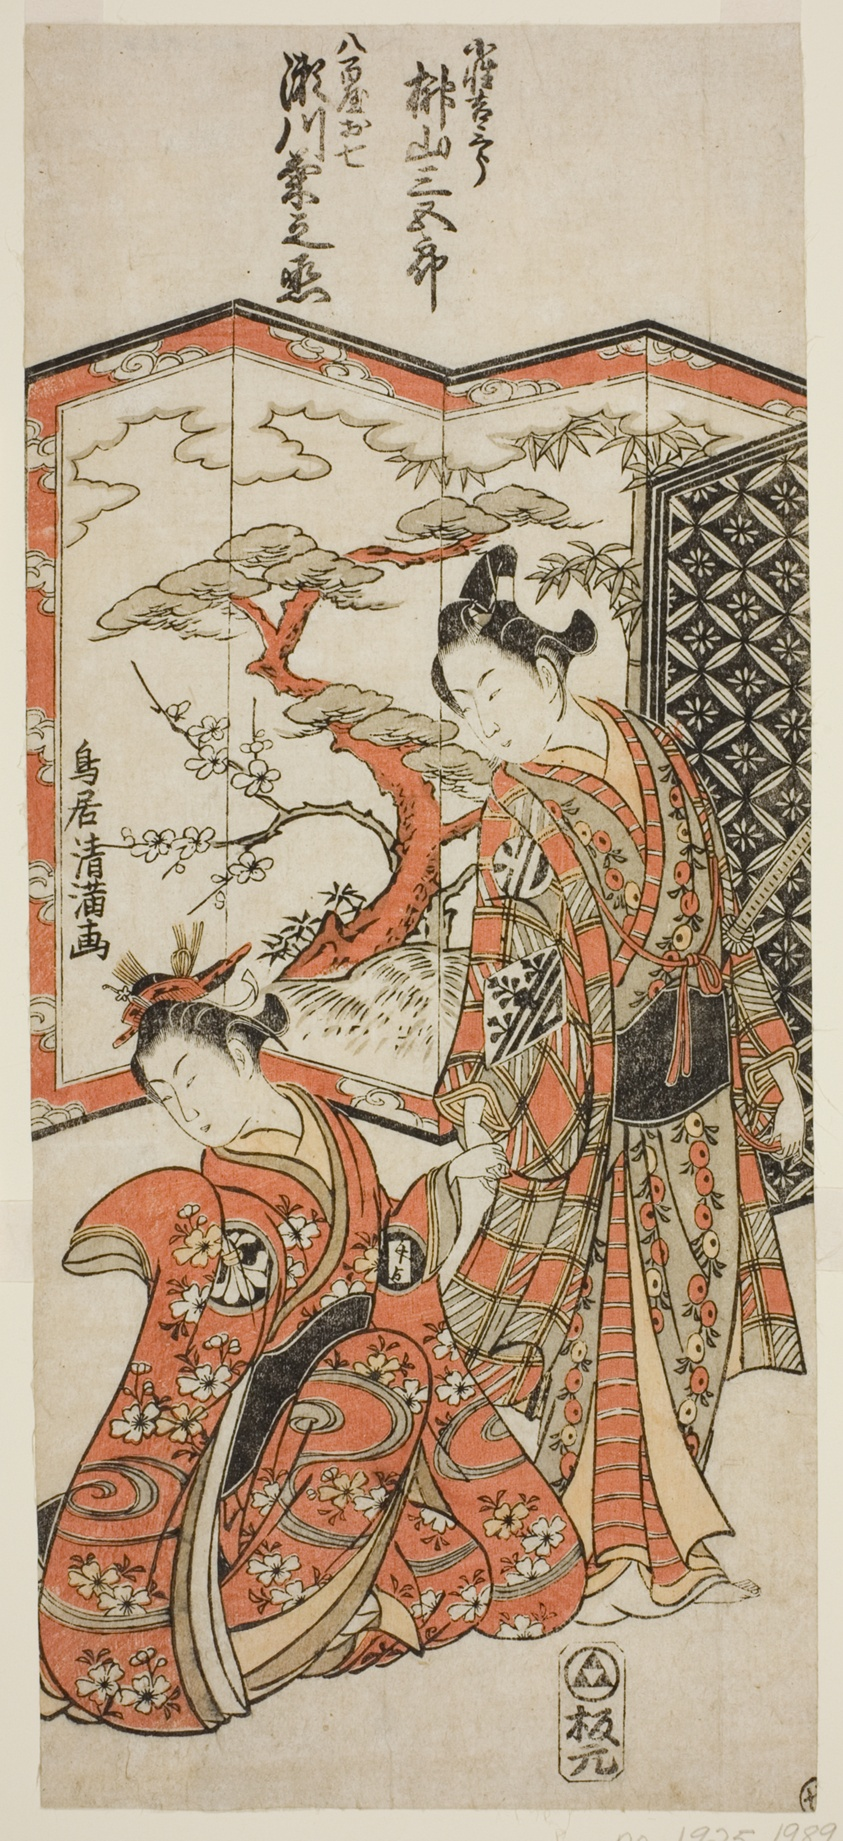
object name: Print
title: The Actors Sakakiyama Sangoro as the page boy Kichisaburo and Segawa Kikunojo II as Oshichi in the play "Hatsugai Wada no Sakamori," performed at the Nakamura Theater in the first month, 1759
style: Japanese (culture or style)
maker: Torii Kiyomitsu I (Japanese, 1735–1785)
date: 1759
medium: Color woodblock print; hosoban, benizuri-e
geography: Japan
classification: woodblock print; print; asian art